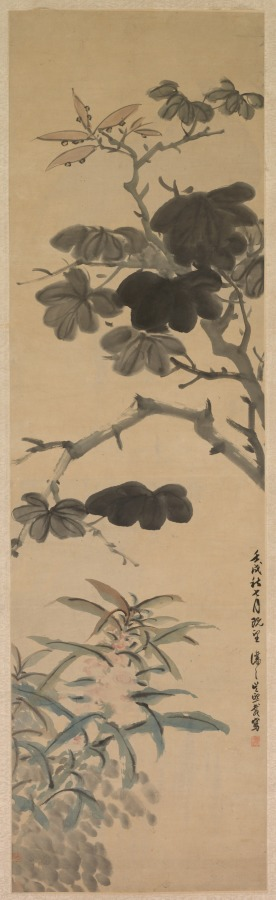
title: Flowering Plants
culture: China, Qing dynasty (1644-1911)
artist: Wu Rangzhi (Chinese, 1799–1870)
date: 1862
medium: hanging scroll, ink and color on paper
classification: Painting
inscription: Signed and dated inscription by the artist with one seal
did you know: Painter and calligrapher Wu Rangzhi was also an expert in seal cutting.